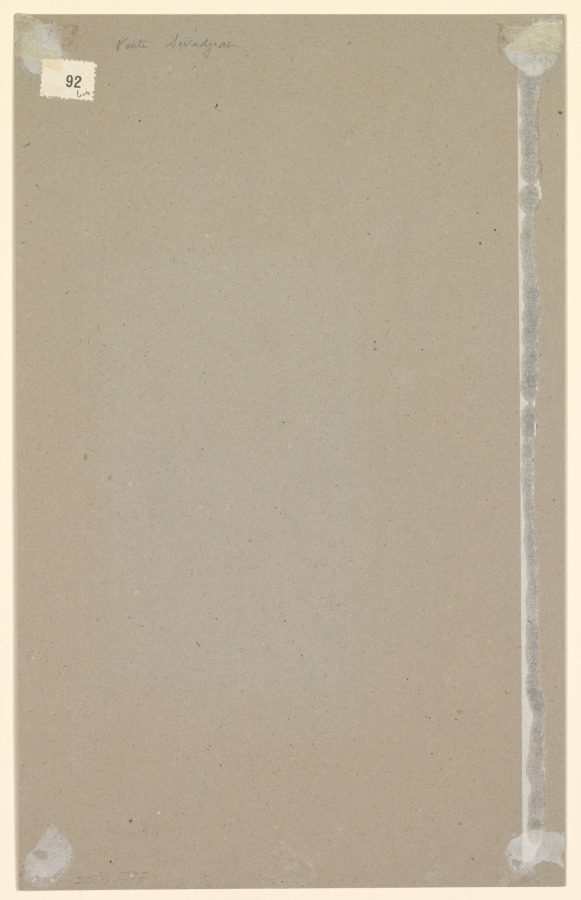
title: A holy man prostrating himself before a learned prince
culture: Mughal India, court of Akbar (reigned 1556–1605)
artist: attributed to Manohar (Indian, active late 1500s)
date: c. 1585; border added probably 1700s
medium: ink on paper, laid down with borders of gold-decorated blue paper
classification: Painting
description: Manohar riffs on the work of his father, Basavana, by showing a holy man bowing at the feet of a prince, instead of another holy man. Those who could recognize the relationship between this work and that of his father (CMA 2013.296) would impress gatherings of courtly connoisseurs, who prided themselves on being able to identify the hand of individual artists just by looking at the paintings. Recitation of poetry would accompany the viewing of paintings and drawings. Virtuoso artists reflected glory on their patrons. As an Islamic ruler, Akbar and his court participated in these activities—a new purpose for art that Indian artists had to learn.